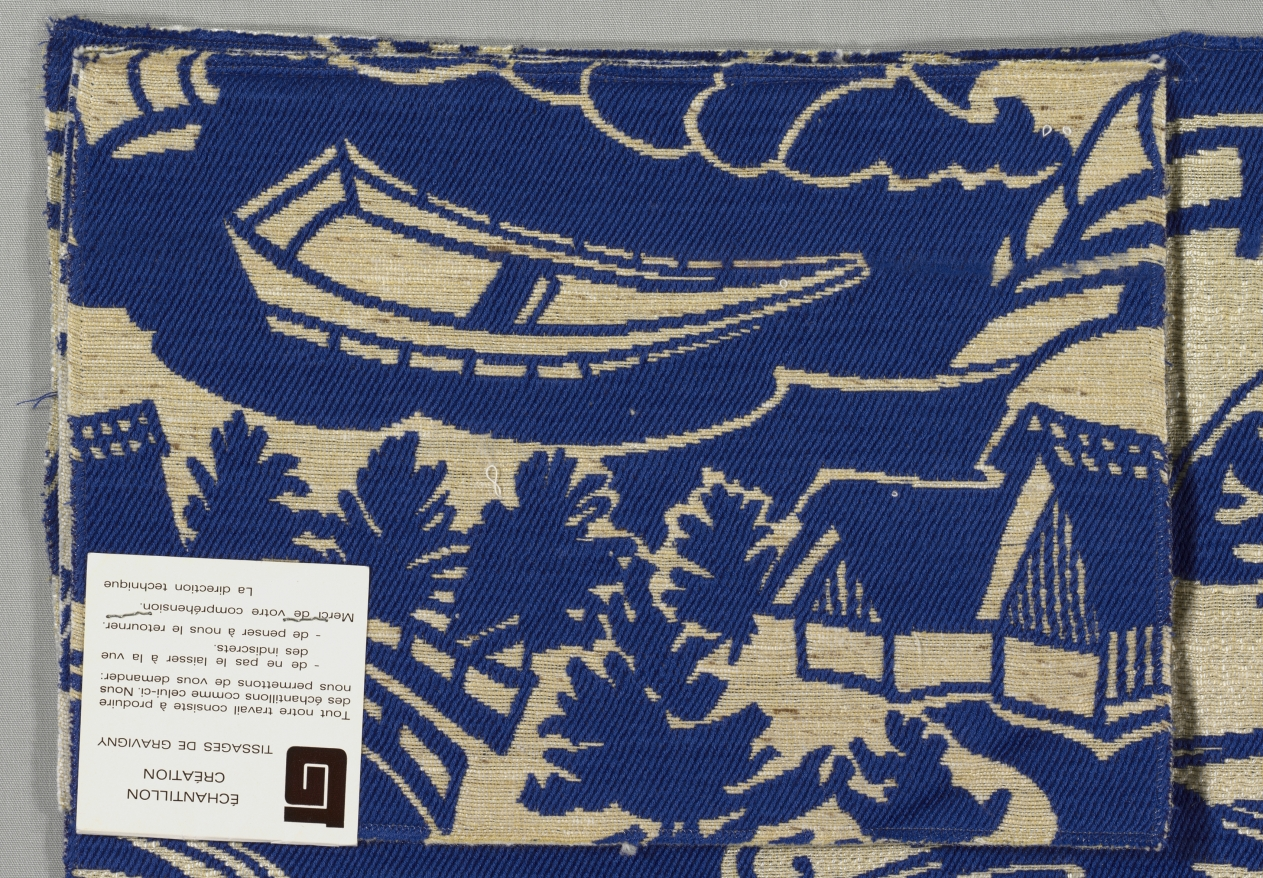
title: Showroom Sample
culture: France, Normandy, 20th century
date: 20th century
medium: damask weave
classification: Textile